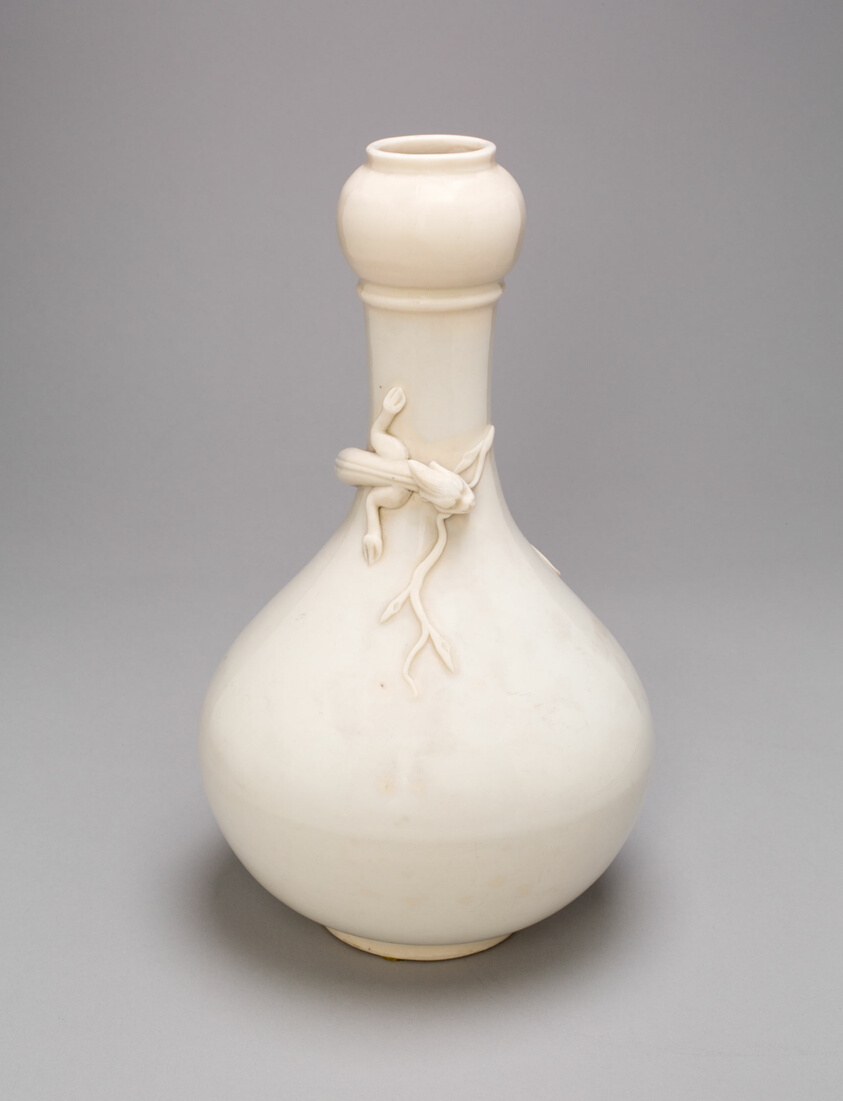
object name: Vessel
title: Bottle-Shaped Vase with Lizard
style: Chinese (culture or style)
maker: China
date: Ming dynasty (1368–1644) or Qing dynasty (1644–1911), c. late 17th/18th century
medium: Dehua ware (blanc de chine); porcelain with underglaze molded and applied decoration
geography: China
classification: vase; porcelain; vessel; asian art; ceramics